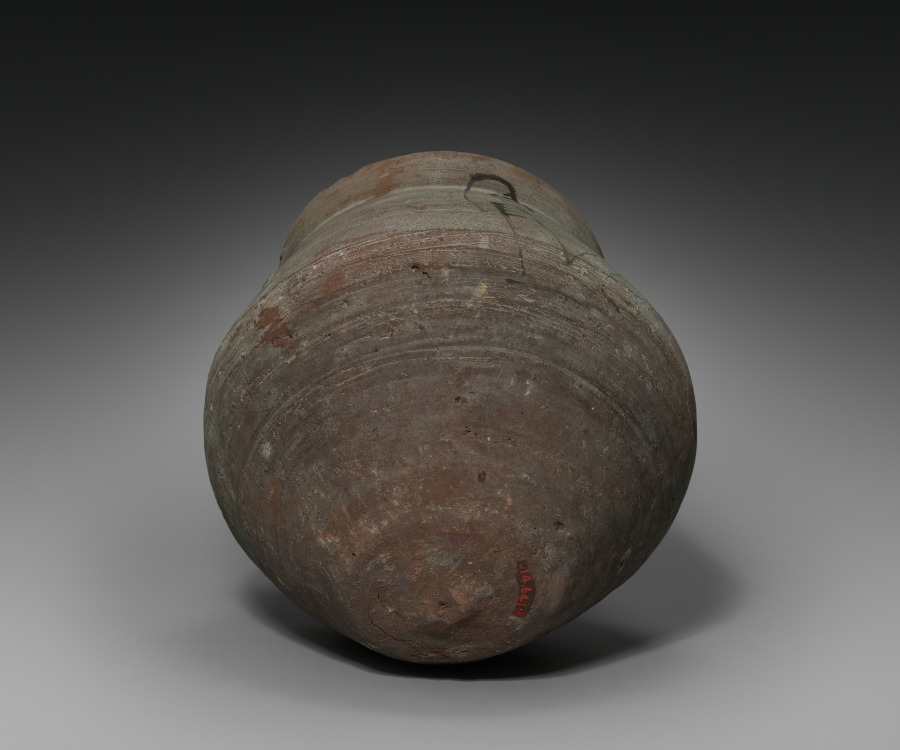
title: Shawabty Jar with Lid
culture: Egypt, New Kingdom (1540–1069 BCE), Dynasties 19–20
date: 1295–1069 BCE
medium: Nile silt ware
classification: Funerary Equipment